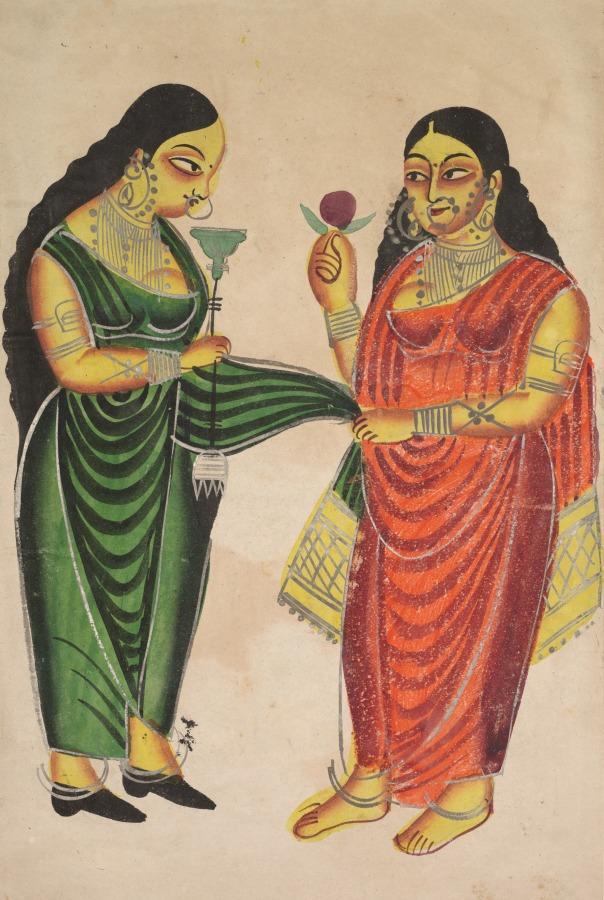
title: Leaf from a Kalighat album: Maid bringing a hookah to a lady (recto); Krishna weighed against precious objects(?) (verso)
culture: Eastern India, Bengal, Kolkata, Kalighat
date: c. 1890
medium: Gum tempera, graphite, ink, and tin on paper; Woodcut, hand colored with gum tempera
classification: Painting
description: Kalighat paintings reflect the time and context in which they were created. Kalighat painters used their medium to offer penetrating and insightful critiques of British-influenced Indians as well as the British themselves through satires and caricatures. Newly rich Bengali native Indian clerks (babus) aspired to dress and behave like their British masters, and Kalighat painters taunted them for this. The maid, dressed in green, holds a hookah in her right hand. The lady in red is likely a fashionable high society concubine or prostitute known and depicted at this time as hookah-smoking, makeup-wearing, paan- (betel leaf with areca nut and lime paste) chewing hussies. The wealth created by the East India Company made it possible for Bengali babu dandies to have concubines and pay for prostitutes.